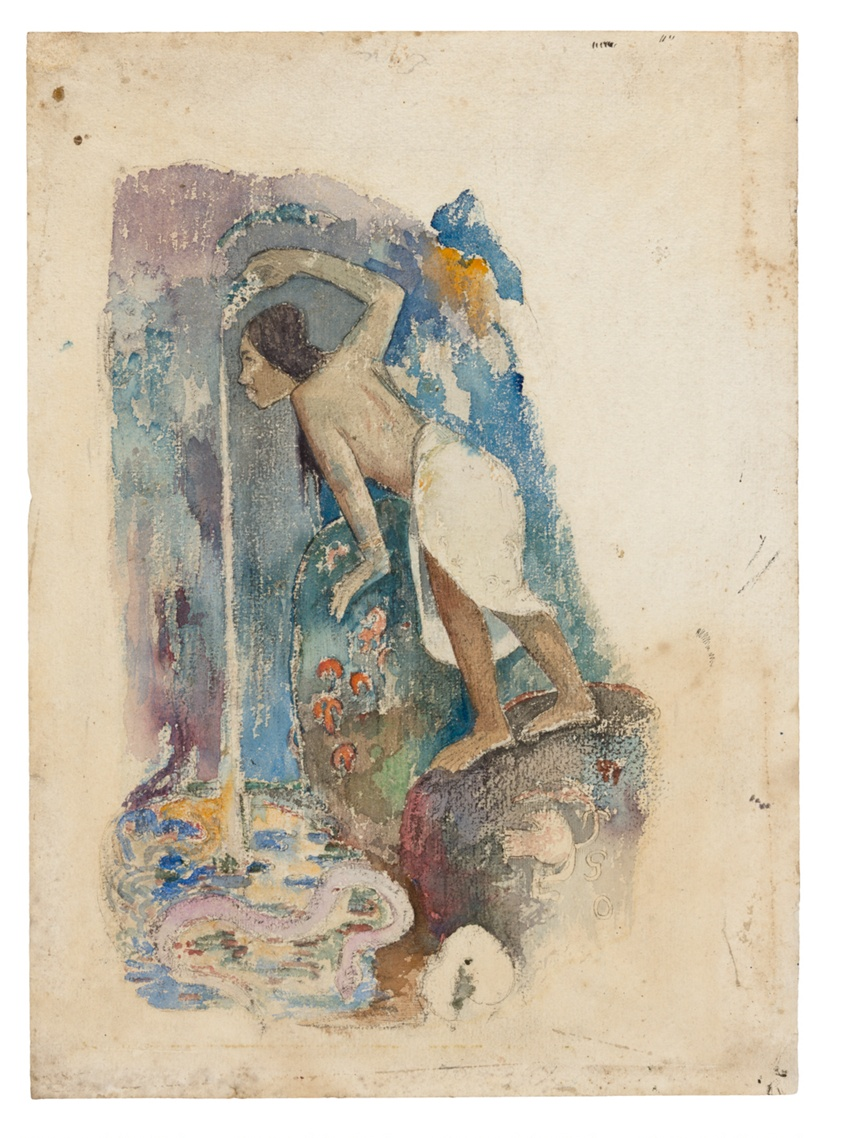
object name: Drawing and Watercolor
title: Pape moe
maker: Paul Gauguin (French, 1848-1903)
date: 1893/94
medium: Watercolor, with black fabricated chalk, pen and brown ink (originally purple) and touches of brush and black ink on heavily textured ivory wove paper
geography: France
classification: pen and ink drawings; drawings (visual works); prints and drawing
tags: Century of Progress, world's fairs, Chicago World's Fairs